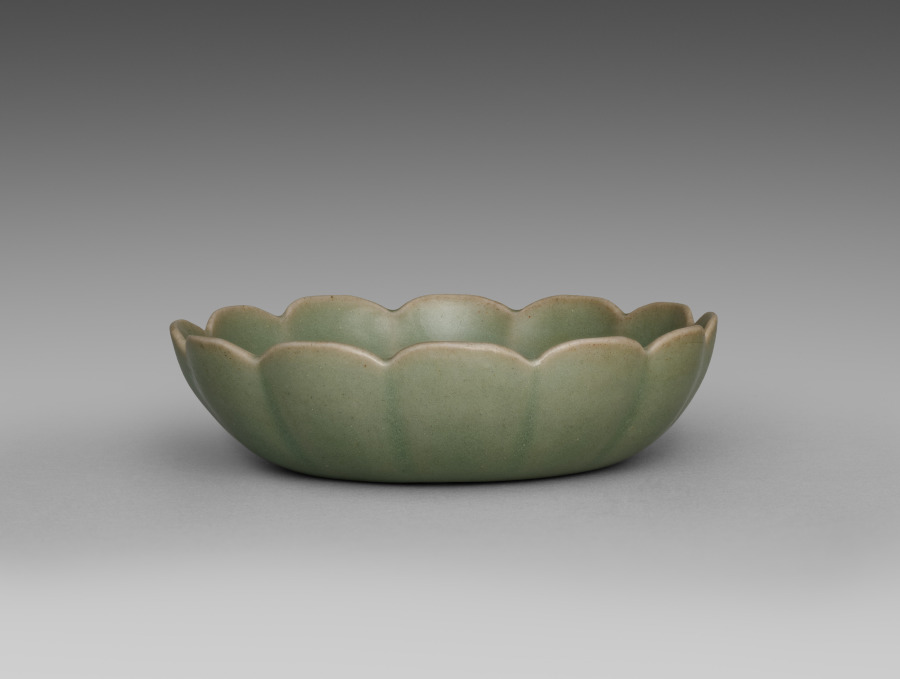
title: Celadon Dish with Molded Phoenix Design in the Shape of a Flower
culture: Korea, Goryeo dynasty (918–1392)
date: 1200s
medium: Celadon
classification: Ceramic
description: Celadon wares intended for everyday use—such as this dish—were among the most common burial objects placed in tombs during the Goryeo period (918–1392). Furnishing tombs with elaborate assemblages of objects was believed to honor the deceased and provide comfort in the afterlife. This dish, featuring the image of a flying phoenix, was likely a cherished possession that accompanied its owner to their final resting place.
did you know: The phoenix motif at the center of this dish symbolizes cosmic harmony and prosperity in traditional East Asian cultural and artistic expression.